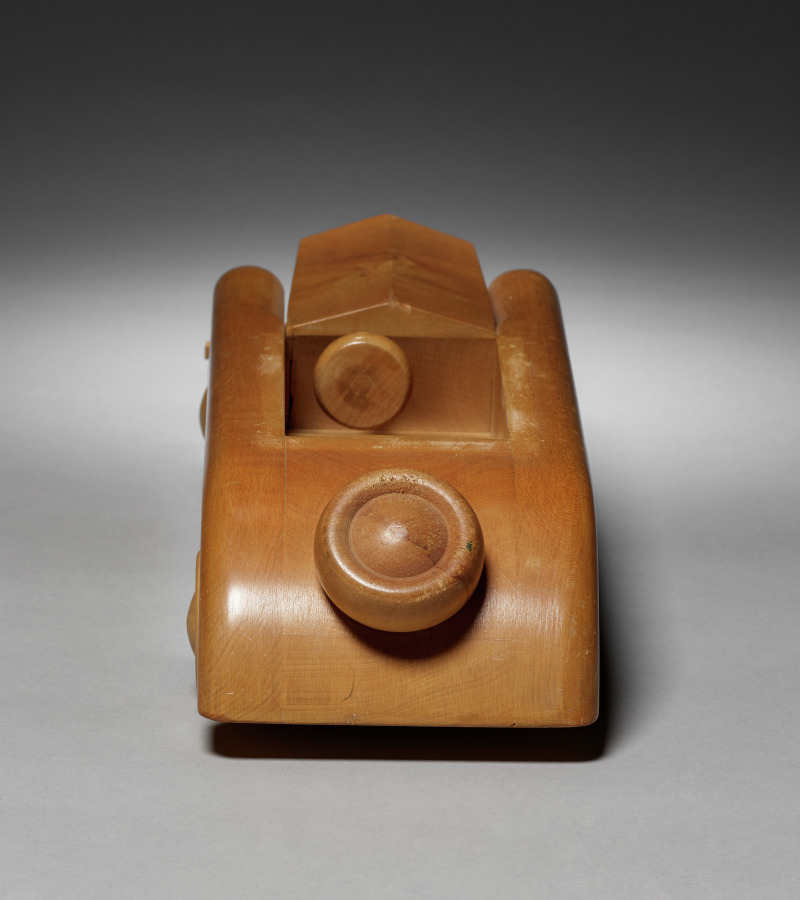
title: Streamline Automobile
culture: Denmark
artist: Boysen Toys (Danish)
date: 1900s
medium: wood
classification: Wood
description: Credit line: John D. Rockefeller General Education Board Grant II